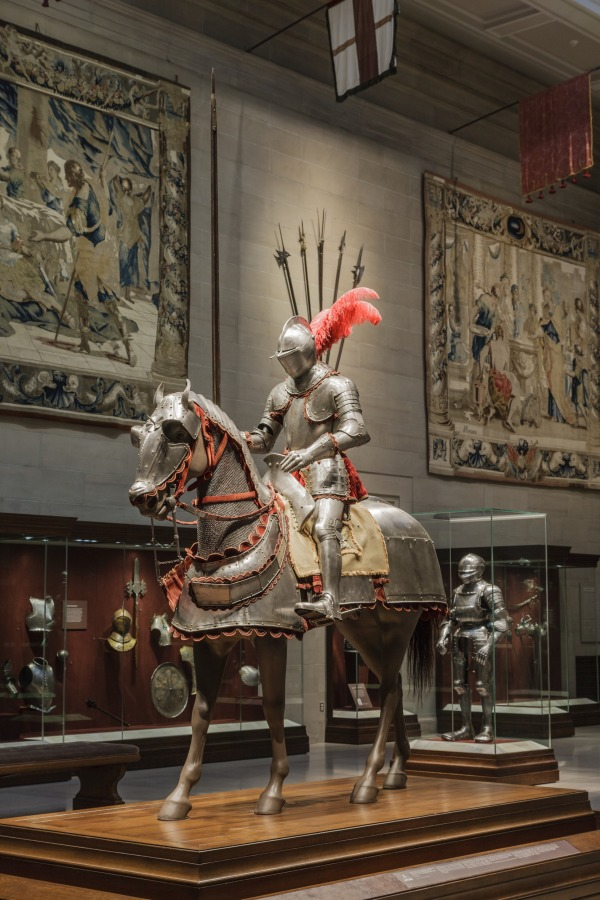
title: Armor for Man and Horse with Völs-Colonna Arms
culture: North Italy, 16th century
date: c. 1575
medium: steel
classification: Arms and Armor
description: A knight depended on his horse both as a weapon and a means of defense. He therefore had to take great care to protect his charger. From the 1100s on, knights first covered their steeds in trappings of fabric and later of mail. By around 1400, full steel plate armor for horses was complete. It is possible that this armor made for both man and horse originally belonged to a "garniture," an armor with multiple customized exchange elements that could convert the basic suit to various field and sporting uses. With different pieces of the garniture attached, this suit could have been worn either in battle or in various tournament games. The total combined weight of both the man's and horse's armor is 114 pounds. The etched decoration of this armor is of a type that became fashionable in northern Italy during the late 1500s. It consists of ornamental bands of etched figures, animals, portrait busts, and armor trophies. In addition, a coat of arms is represented seven times in different places—the center of the breastplate and blackplate, the front and back of each pauldron (shoulder defense), and the center of the peytral (horse's breastplate). The coat of arms is that of the Colonna family quartered with another, still unidentified family. It probably belonged to an unknown member of the Völs-Colonna family from the South Tyrol, now part of northern Italy.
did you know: The Vols-Colonna family crest is found seven times in prominent locations on this armor set for horse and rider.